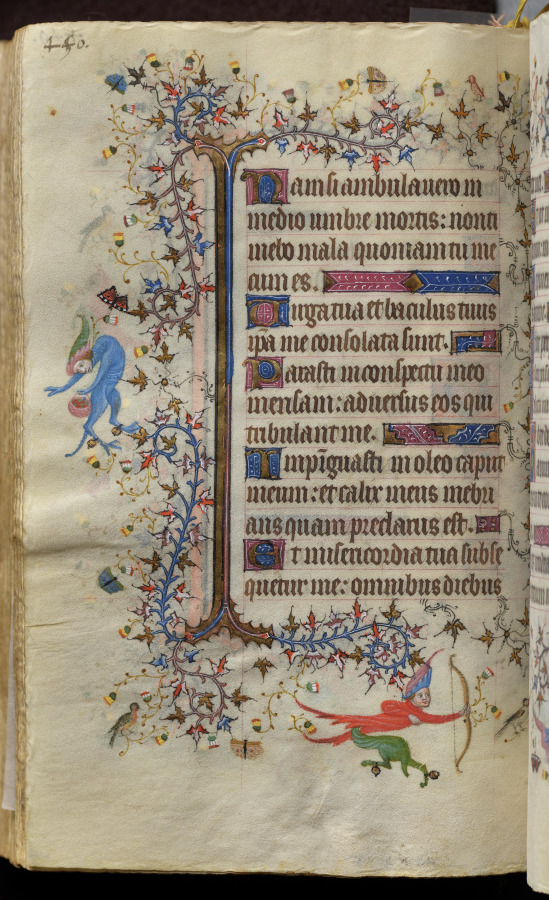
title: Hours of Charles the Noble, King of Navarre (1361-1425): fol. 219v, Text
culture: France, Paris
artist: Master of the Brussels Initials and Associates (French)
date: c. 1405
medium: ink, tempera, and gold on vellum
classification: Bound Volume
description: This precious volume was obviously highly prized by its owner, the French-born King of Navarre, who had his coat of arms painted on no less than twenty folios. Rather than directly commissioning this manuscript from a specific workshop, it seems that Charles the Noble acquired his book of hours -- perhaps ready-made for the luxury market -- while on a trip to Paris in 1404-05. A collaborative effort, six painting styles are evidenced within the pages of this codex, those of two Italians, two Frenchmen, and two Netherlanders. The painter who was responsible for the planning and decoration of the book, and who produced seventeen of the large miniatures, was a Bolognese artist known as the Master of the Brussels Initials. His principal assistant, responsible for most of the borders, was a Florentine who signed his name "Zecho" da Firenze on folio 208 verso.